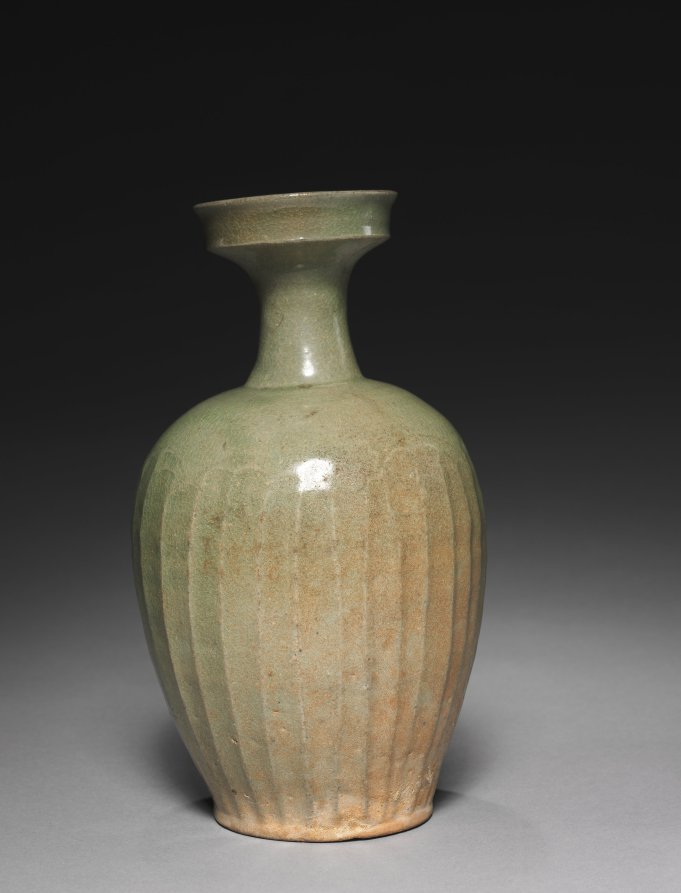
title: Wide-Mouthed Vase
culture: Korea, Goryeo dynasty (918–1392)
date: 1000s–1100s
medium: porcelaneous ware with celadon glaze and fluted and incised decoration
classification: Ceramic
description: As early as the seventh century, the practice of drinking tea and wine became an important part of elite culture in Korea. Elites of the Goryeo period commissioned a variety of types of utensils and vessels including this handsome wine bottle, to make their drinking experience more exciting.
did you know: The translucent greenish and bluish glaze of Goryeo celadons, shown in this vase, is the result of distinctive small and long Korean kilns, which maintained a low oxygen saturation with a high level of carbon dioxide.